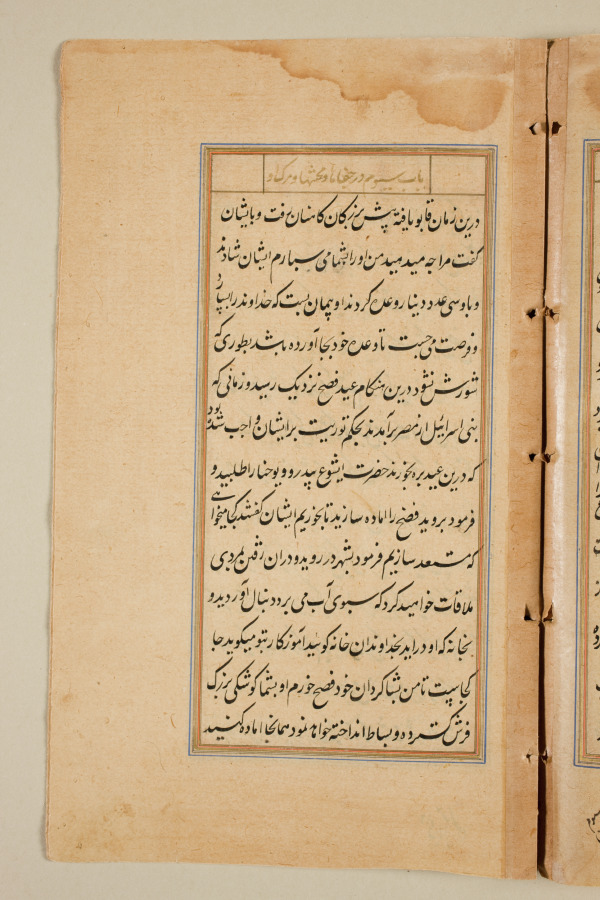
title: Text page from a Mirror of Holiness (Mir’at al-quds) of Father Jerome Xavier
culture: Mughal India, Allahabad, made for Prince Salim (1569–1627)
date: 1602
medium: Ink and gold on paper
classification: Manuscript